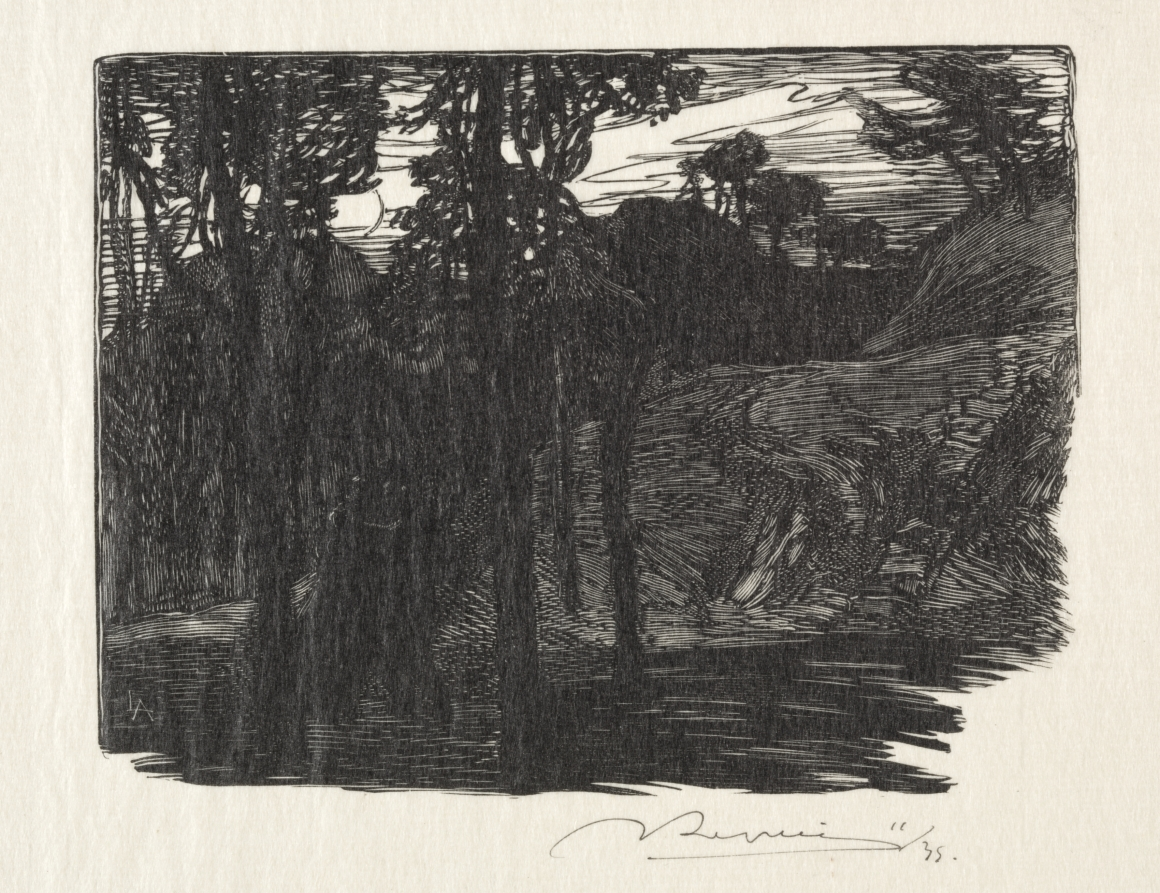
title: Evening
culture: France, 19th-20th century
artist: Auguste Louis Lepère (French, 1849–1918)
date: 1895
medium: wood engraving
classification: Print